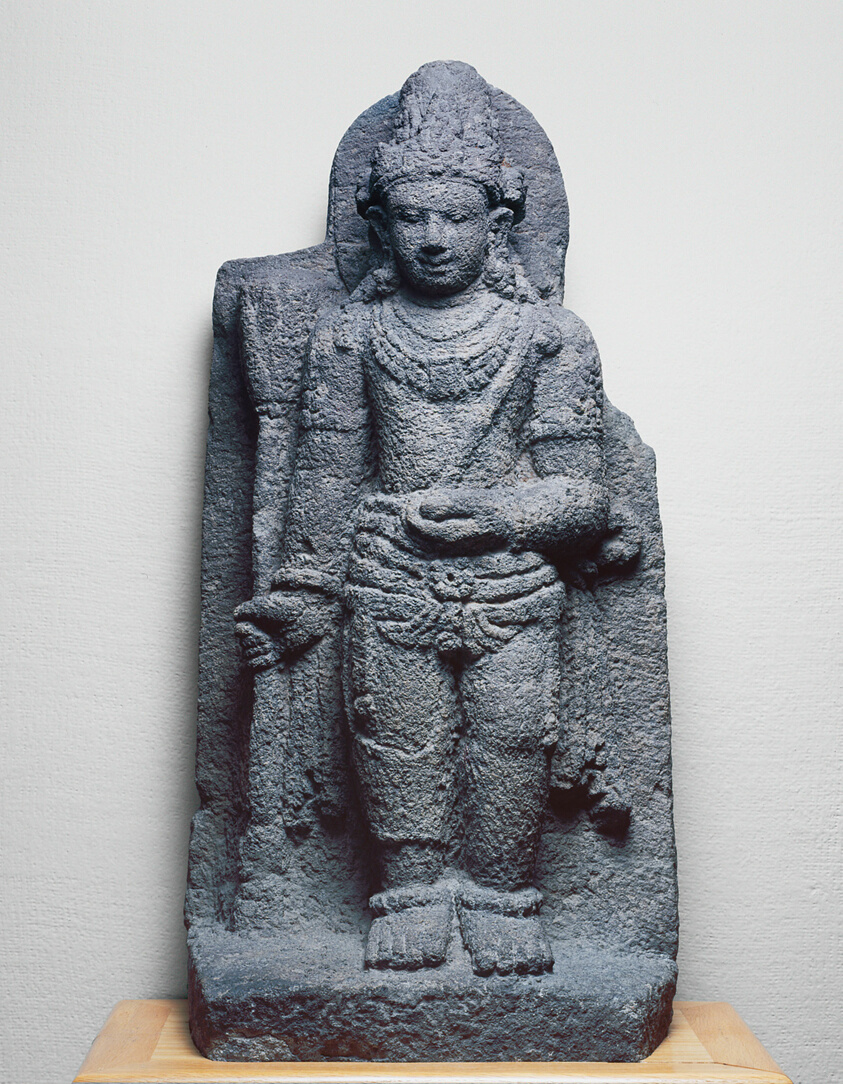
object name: Sculpture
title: Bodhisattva Manjushri Holding a Blue Lotus (Utpala)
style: Southeast Asian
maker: Indonesia; Central Java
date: 9th/10th century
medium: Andesite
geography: Central Java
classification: bronze; metal; sculpture; asian art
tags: religion, bodhisattva, Buddhism